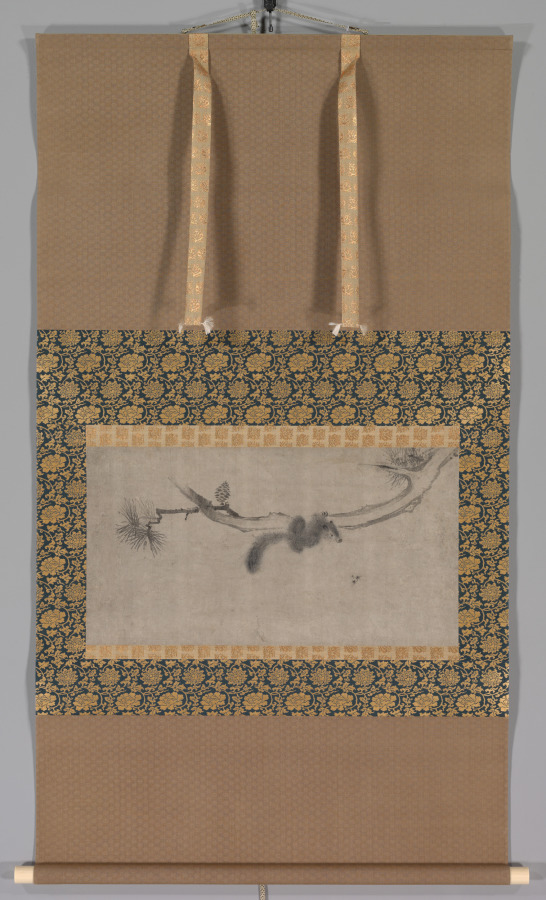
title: Squirrel on a Pine Branch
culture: China, Ming dynasty (1368–1644)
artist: Song Tian (Chinese, active 1300s)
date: 1500s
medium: hanging scroll, ink on paper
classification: Painting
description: This painting captures a squirrel in action, distracted and twisting its head while climbing and looking at a little bug to the right. The painter skillfully employs a combination of ink washes and fine brushstrokes to simulate the animal’s fur. Only three simple curved lines depict the squirrel’s claws. The subject of squirrels did not appear in Chinese painting before the late Southern Song (1127–1279) and Yuan periods (1279–1368). The painter Songtian was one of the few Yuan painters who specialized in this theme.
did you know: Although the evergreen pine does not indicate a time of year, the lively activity of the squirrel and the insect suggest a warm season.